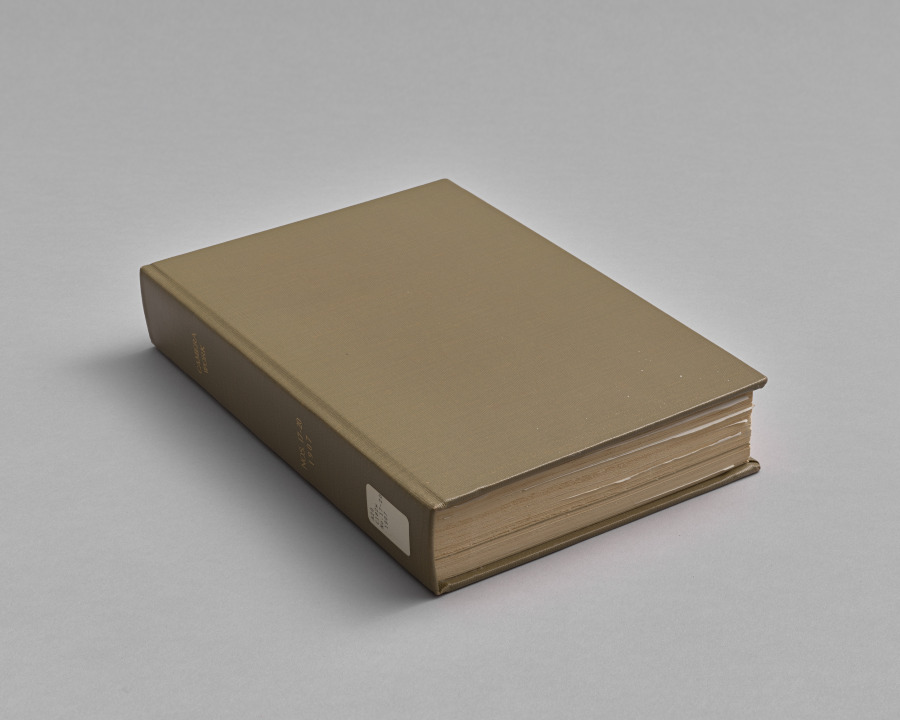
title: Camera Work: Number 18, April 1907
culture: England, 19th century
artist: George Davison (British, 1856–1930)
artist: Sarah C. Sears (American, 1858–1935)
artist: William B. Dyer (American, 1860–1931)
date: 1890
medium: photogravure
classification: Bound Volume